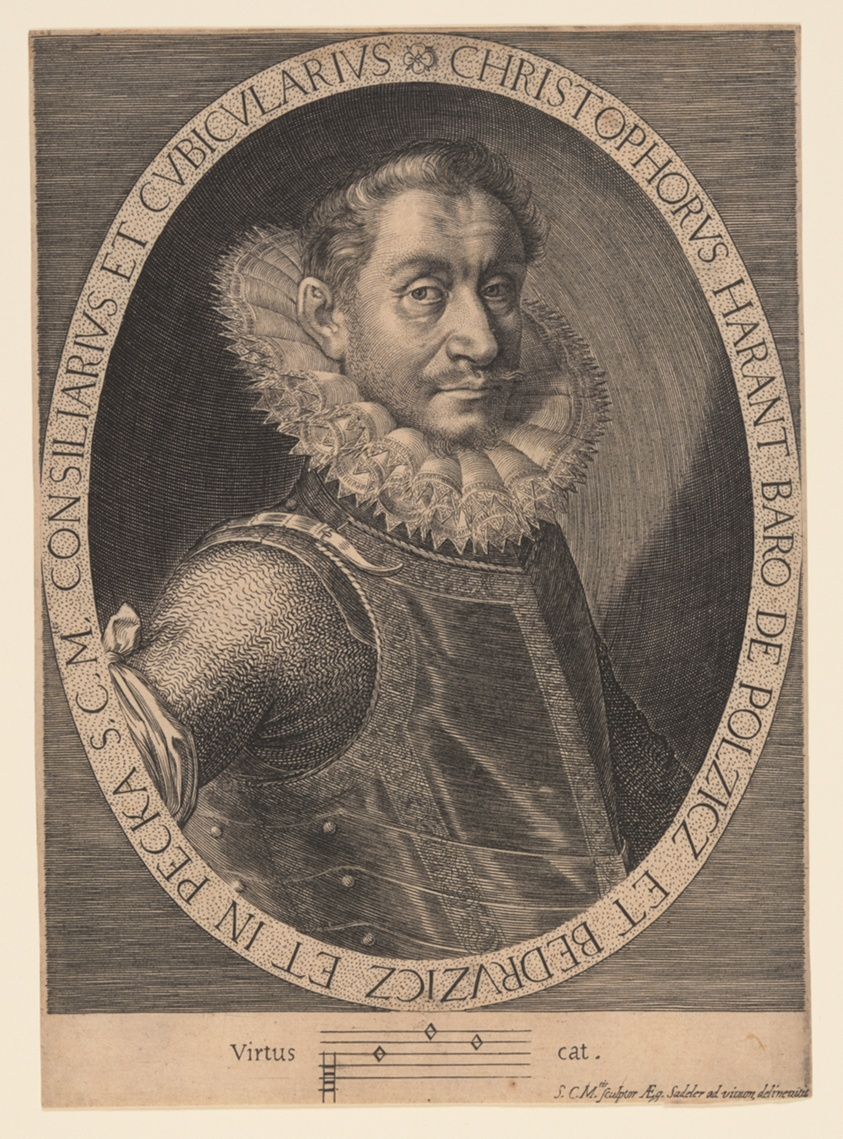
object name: Print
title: Christopher Harant, Czech Nobleman and Humanist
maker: Aegidius Sadeler II; Flemish, c. 1570–1629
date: c. 1600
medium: Engraving on paper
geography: Flanders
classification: engraving; paper; print; prints and drawing